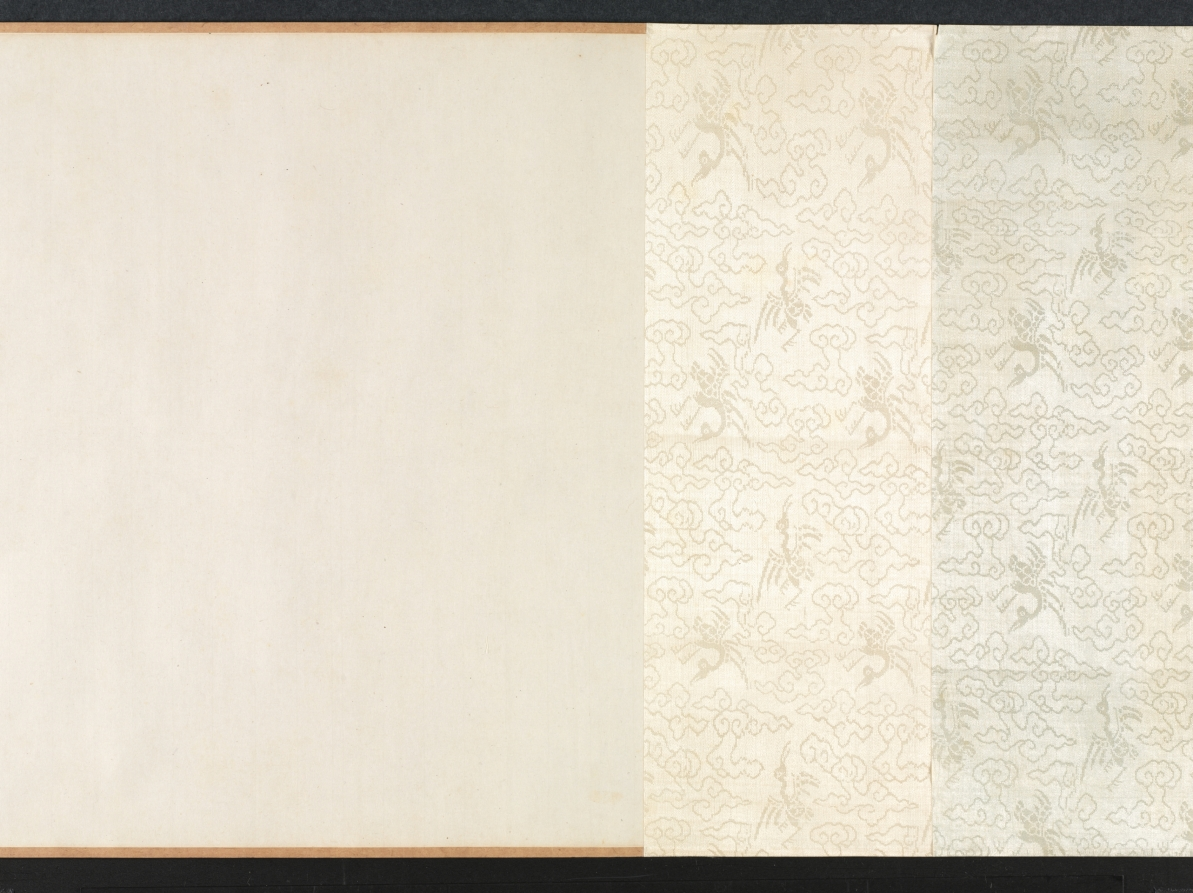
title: Hall of Lofty Pines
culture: China, Qing dynasty (1644-1911)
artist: Wang Hui (Chinese, 1632–1717)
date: 1703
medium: handscroll; ink and color on paper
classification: Painting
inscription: [題] 松喬堂圖 康熙癸未夏六月, 海虞耕煙散人王翬畫。[印]王翬之印; 石谷. [左下] 來青閣; 耕煙野老時年七十有二.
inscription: 松喬堂圖一卷，海虞石谷王君為靜海近公厲少司冦公作也。圖成于癸未之夏。未幾而公遂仙去。公令子今編修君南湖屬余題跋其後。余與公同官侍從，交契最深。側見公之清修純德，蔚為聖天子所眷重。侍直內廷，密勿贊襄，幾二十餘年。蒼生之所以受賜，士林之所以沐德者，天下莫能窺，在廷莫能悉。而公卒不言。以故宸衷日益契，恩禮亦日益渥。雖年逾懸車，時有歸老之念。而上固不聼公之去。其所謂松喬堂者，御書以賜公者也。蓋以松比公之清風勁節，而歲寒不改，經霜彌茂。則又以期公之壽考未有艾焉。公知此身未易乞，而山林槃磵之樂，止可寄諸寤思。此松喬堂圖之所由作也歟。石谷此圖，結構精密，筆墨超邁。其寫樹木之蒼蔚，堂宇之靚幽。恍見摩詰輞川樂天廬山之勝。獨惜公未得一日徜徉故園以償其願。即繪於圖亦未得以永其趣，此編修君之所以眷眷不忘也。雖然千歳之松喬，下蔭百畝，上以修棟梁之需。然則上當日名堂之意，不更望於後之人襲其芘而養其材也哉。吾願編修君之寶斯圖。并望君之塗塈丹雘，大其堂構也已矣。 康熈丙戍重陽三日，雲間王鴻緒跋。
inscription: 10 additional seals: 1 seal of Li Duna 勵杜納 (1628–1703); 4 seals of Zha Ying 查瑩 (jinshi of 1766); 5 seals of Li Yun (dates unknown).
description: Wang Hui 王翬, a leading painter in the orthodox school of the early Qing dynasty (1644–1911), was commissioned to paint this landscape with a country estate for Li Duna 勵杜納 (1628–1703), vice minister of justice in Emperor Kangxi’s court. The emperor had honored Li by granting him a piece of calligraphy with the name of Li’s retirement retreat, “Hall of Lofty Pines.” He drew a comparison between pines and Li’s upright character, resilience, and longevity. Wang Hui’s painting was supposed to allow Li to imagine living in a beautiful, secluded compound among the hills and pines. Sadly, Li died before seeing the completed painting and before receiving the emperor’s permission to retire. The landscape begins with peaceful riverbanks and low hills. The pines around the estate in the middle of the handscroll are truly lofty, some stretching even beyond the frame of the painting. Li Duna, the estate’s owner, is shown twice in his serene mountain retreat: first approaching the entrance to the compound with two servants at the right, and then later in the scroll, to the left, reading in the comfort of an inner room.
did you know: One servant carries the estate owner's carefully wrapped qin, a type of zither.